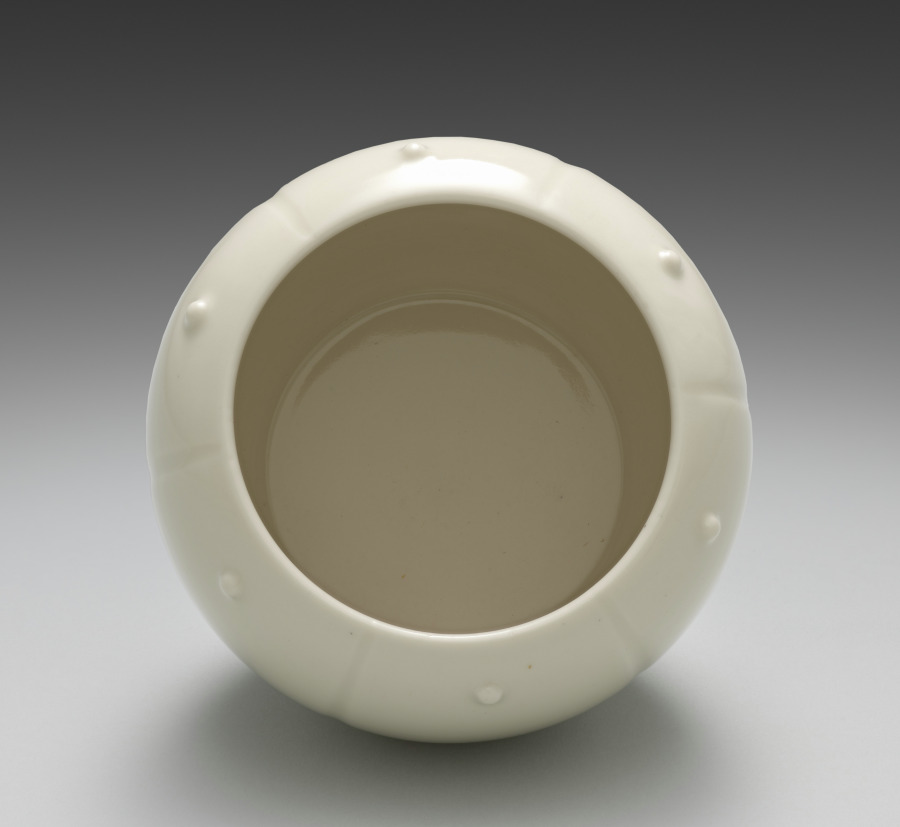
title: Container from Lit Charcoal and Ash Containers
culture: Japan, Meiji period (1868–1912)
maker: Seifū Yohei III (Japanese, 1851–1914)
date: 1893–1914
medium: One from a set of four containers; porcelain with molded design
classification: Ceramic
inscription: 清風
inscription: The storage box for this set is inscribed and impressed with seals.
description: The box lid for these six-lobed lit charcoal and ash containers, or hiire, identifies them as kōhakuji, another of Yohei III’s translucent cream colors over ivory clay bodies. One might translate the name as “lustrous pearl[–glazed ivory] porcelain.” A hiire was filled with ash with burnt coals at the center so that embers and tobacco ash could be discarded safely during a gathering. Each of the lobes on the containers has a round protrusion set below the rim. The studlike pattern is called ruiza. The term is also used to describe the pattern that rings the shoulder of some flower vases or metal kettles used in chanoyu.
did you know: The Seifu studio generally followed the standard practice in Japan for identifying the artist and object in box inscriptions.